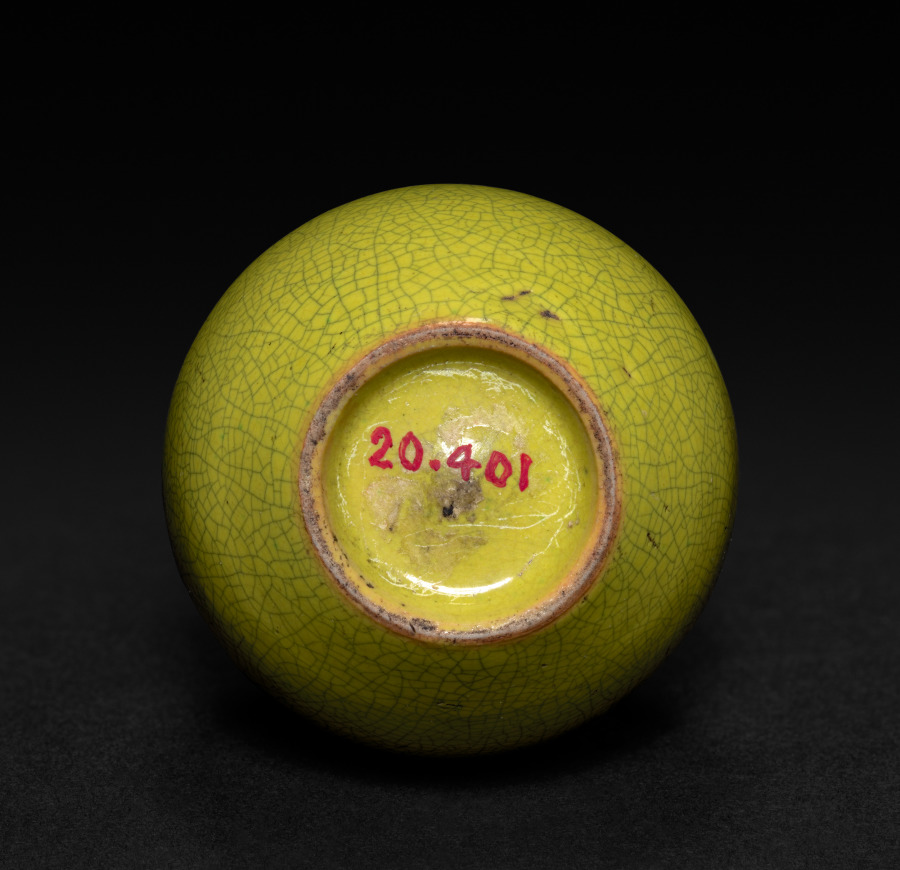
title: Vase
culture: China, Qing dynasty (1644-1911)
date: 1644–1911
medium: porcelain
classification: Ceramic